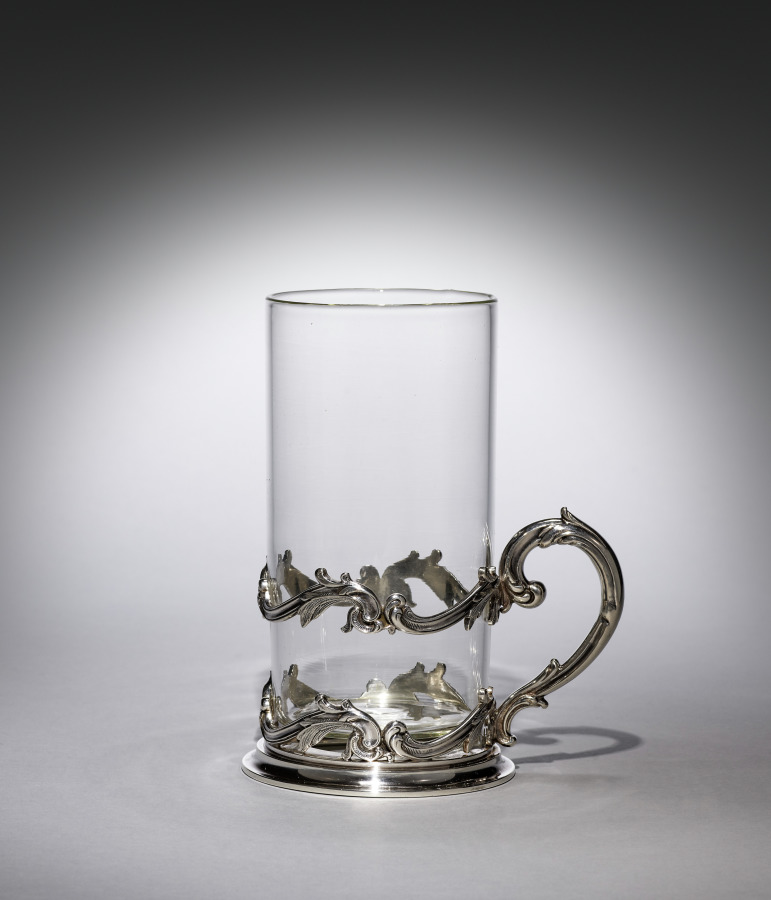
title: Tea Cup and Holder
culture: Russian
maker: House of Fabergé (Russian, 1842–1918)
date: c. 1908–17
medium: silver, glass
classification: Glass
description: Likely from a larger set, this tea glass with its holder is an excellent example of Fabergé’s ability to imbue objects of everyday use with exceptional artistry. The holder features elegant scroll motifs forming two horizontal bands and a handle, an ingenious take on the French ornamental style of the mid-eighteenth century.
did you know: In Russia, tea has been served in glasses since the eighteenth century.